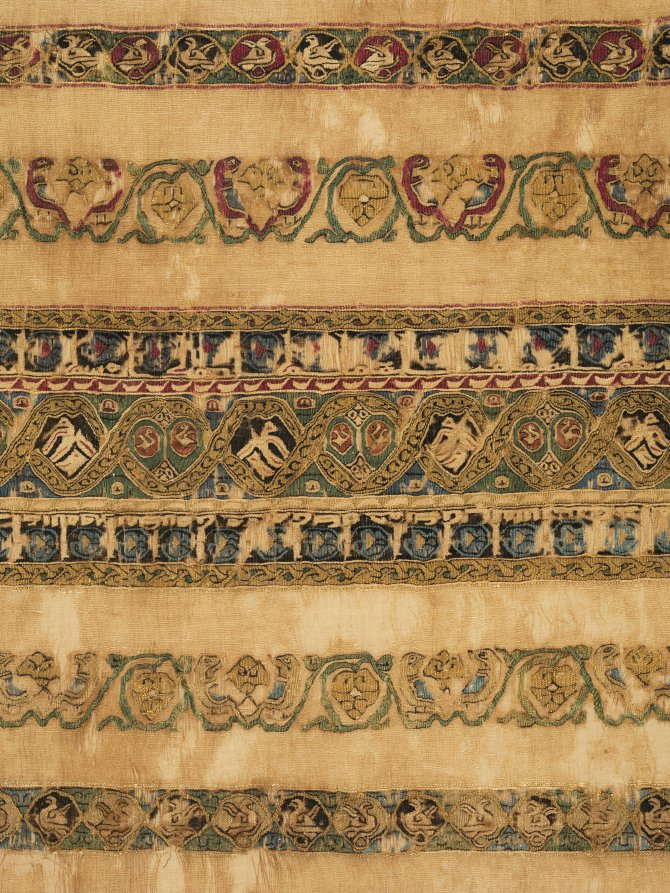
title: Turban or shawl end with tiraz and gold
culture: Egypt, Fatimid period, reign of al-Musta‘lī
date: 1094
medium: plain weave with inwoven tapestry weave: linen, silk, and gold filé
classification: Textile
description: Woven with consummate skill, this very fine linen fabric enriched with silk and gold thread displays small birds amid interlacing bands flanked by Arabic inscriptions. It represents the final artistic and technical height of imperial textiles called tiraz, a Persian word meaning embroidery or decorative work. Here, tiraz refers to textiles with Arabic inscriptions; it can also identify court workshops and their production. The historical Arabic inscription, written in angular Kufic script with decorative letter bowls and palmette scrolls between shafts, reads: “proximate victory to the servant of God and his close friend Ma‘add Abū Tamīm, the imam Ahmad [Abū] al-Qāsim al-Musta‘lī bi-Allāh and his so[ns]” (upper line), and “Commander of the believers bin [a] l-Qāsim Shā[han] shah . . . the believers . . . the Muslims[?] and the believers[?]” (lower line).